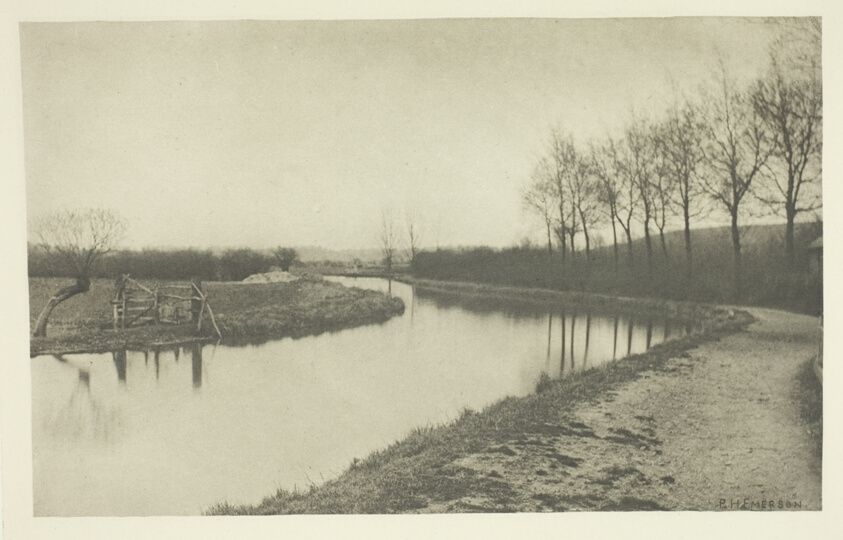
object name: Photograph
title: The River Stort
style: 19th century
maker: Peter Henry Emerson (English, born Cuba, 1856–1936)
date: 1888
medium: Photogravure, plate XV from the album "The Compleat Angler or the Contemplative Man's Recreation, Volume I" (1888)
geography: England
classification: photogravure; photomechanical process; photography; photograph